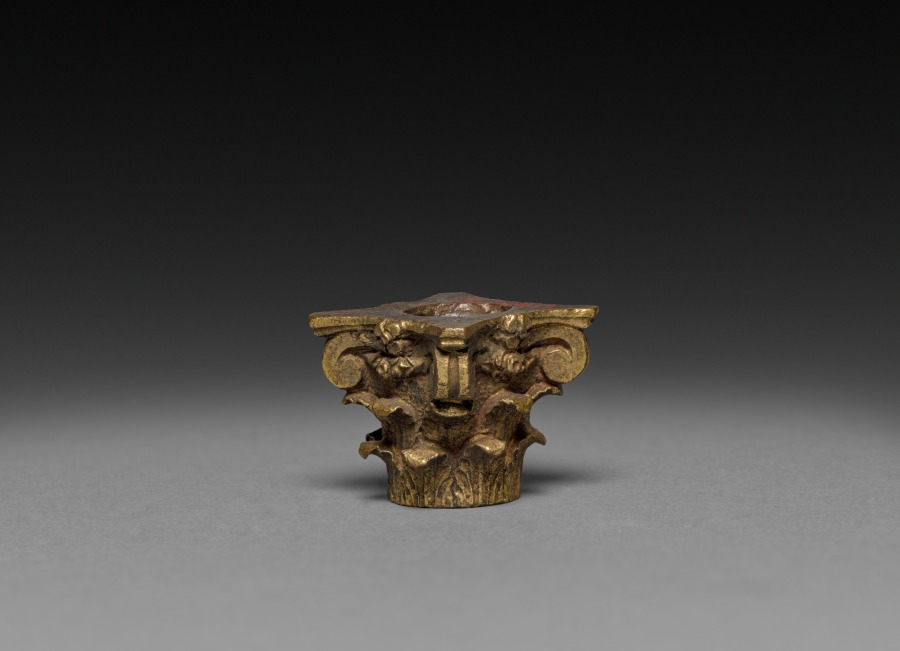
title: Ornamental Capital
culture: France, late 18th century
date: 1775–1799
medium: gilt bronze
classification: Metalwork